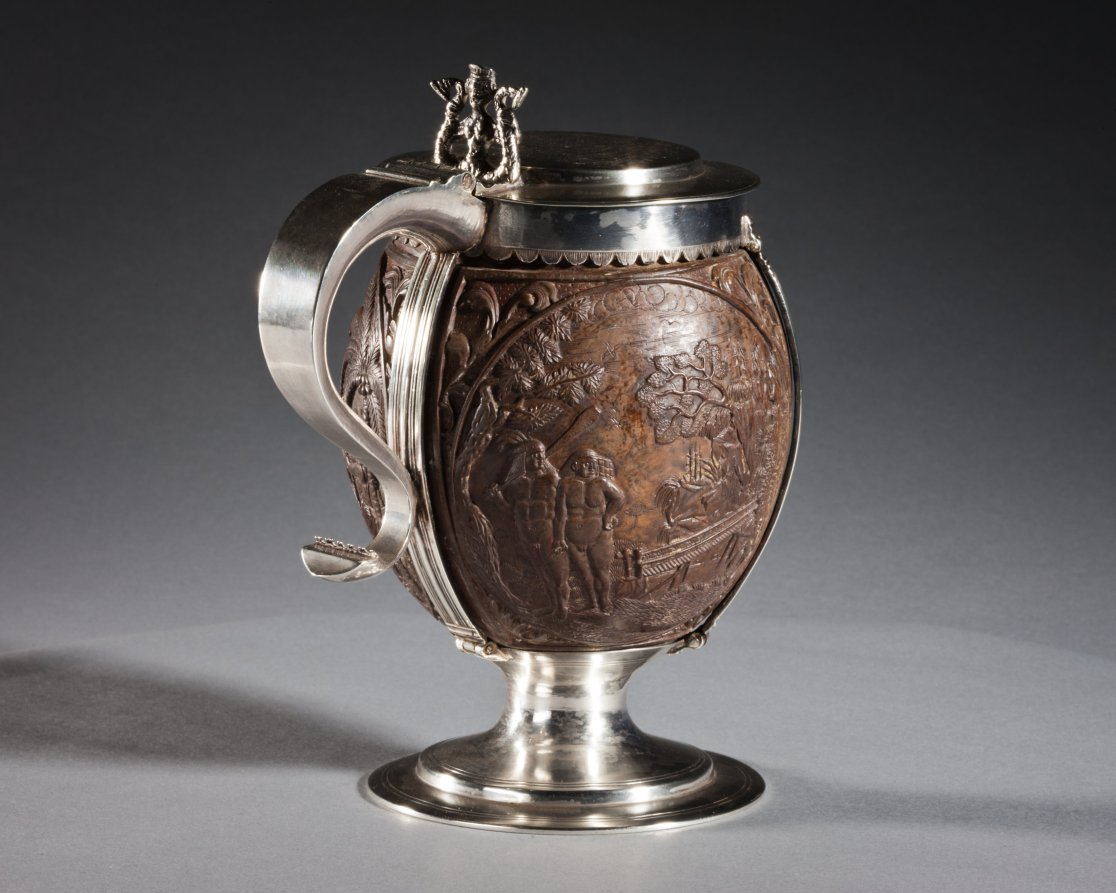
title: Coconut Cup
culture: carved coconut, probably The Netherlands; silver mount, probably England, 17th century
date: c. 1630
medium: carved coconut in silver mount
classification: Metalwork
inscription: top lid has engraved coat-of-arms, underside of lid has inscription: George Lewis TIVERTON Feby, 1st 1760.